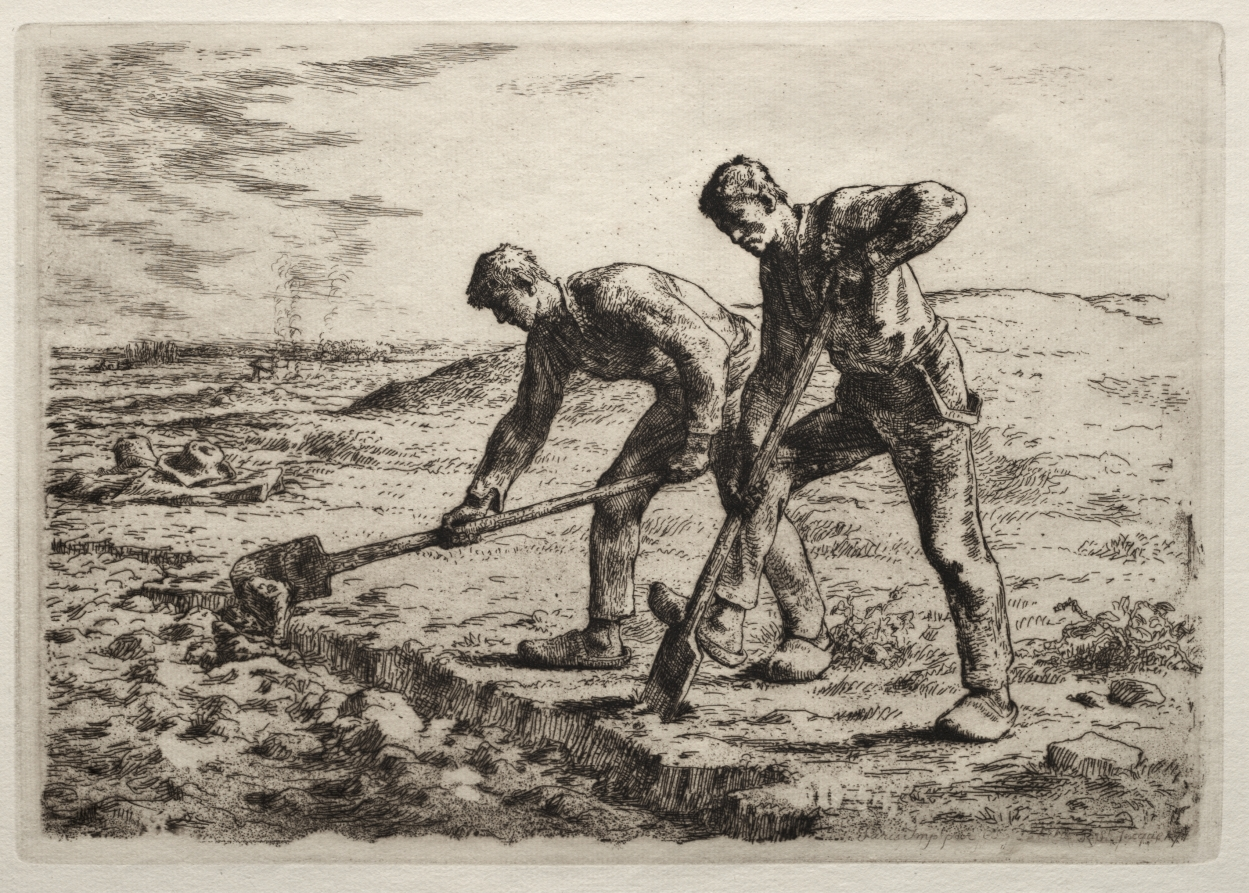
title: The Diggers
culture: France, 19th century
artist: Jean-François Millet (French, 1814–1875)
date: 1855–56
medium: etching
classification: Print